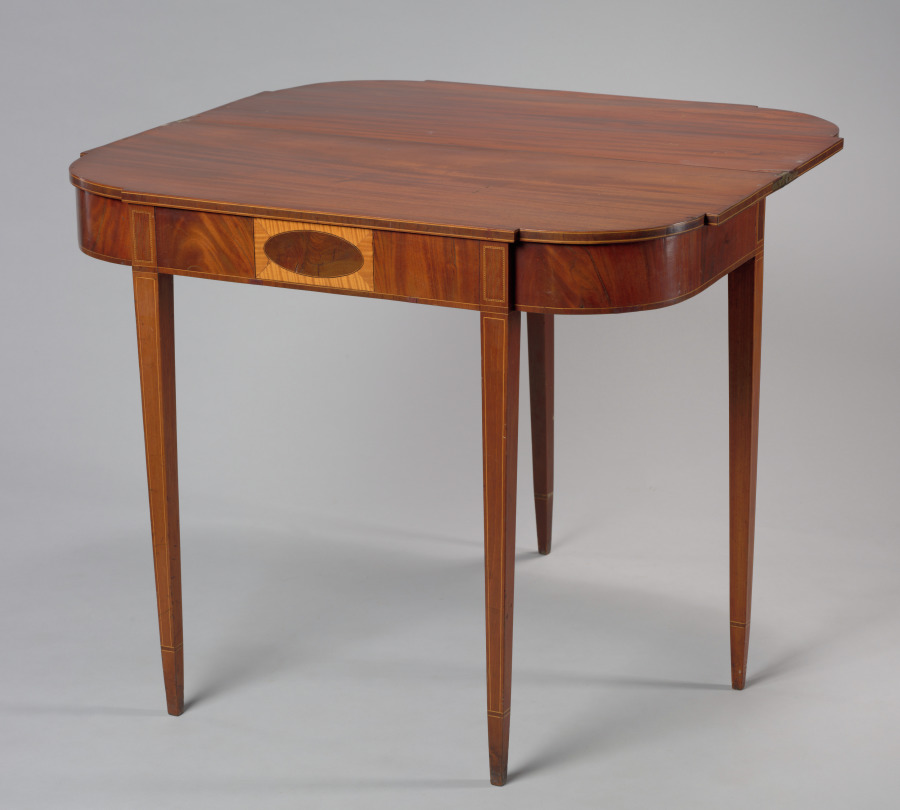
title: Table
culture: America, Sheraton Type, early 19th century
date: early 1800s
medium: mahogany with inlays of various woods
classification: Furniture and woodwork